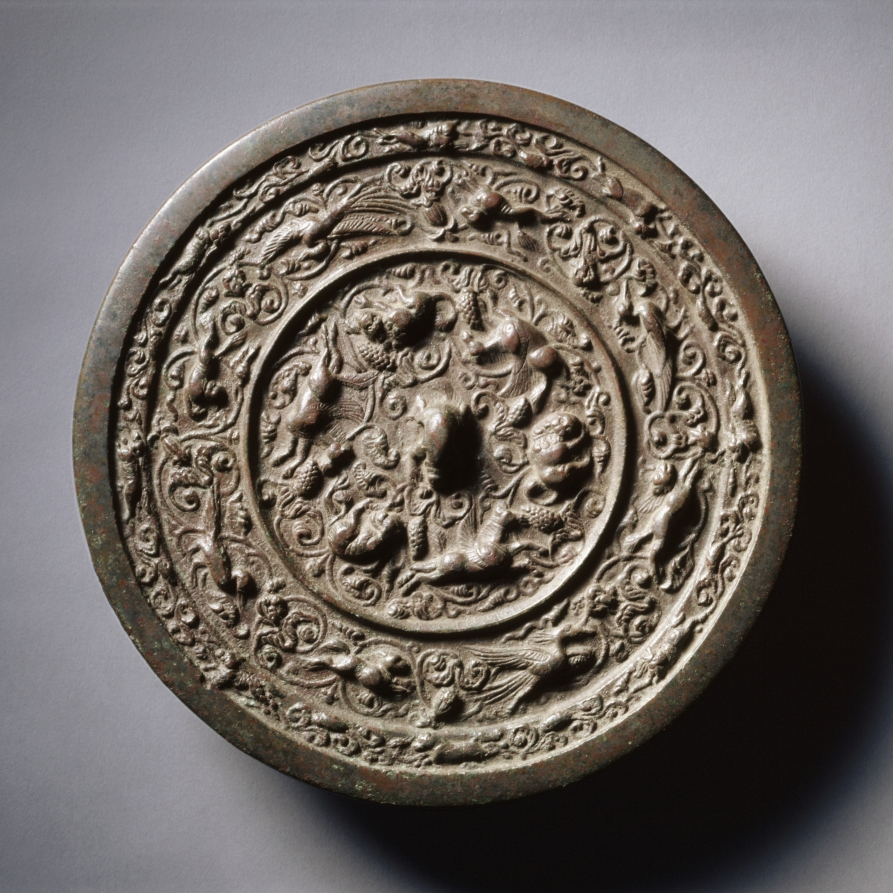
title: Mirror with Auspicious Animals, Celestial Horses, and Grapevines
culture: China, Jin dynasty (1115-1234)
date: early 1100s–mid-1200s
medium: bronze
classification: Metalwork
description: The mirror is covered with thick layers of corrosion that have been partially scraped off the reflecting surface. A small triangular area of undisturbed corrosion remains.